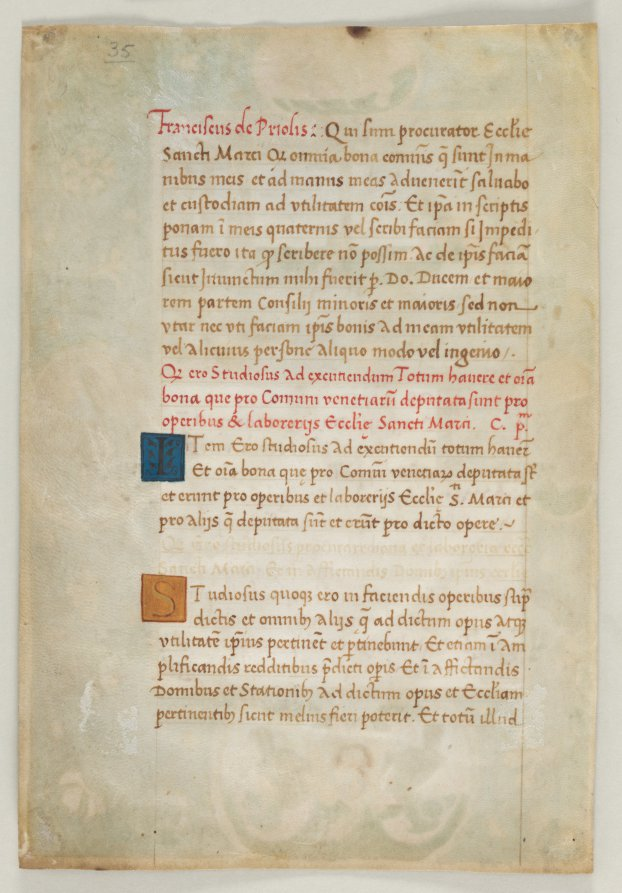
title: Leaf from a Commission: St. Mark Giving the Keys of Venice to Francesco de Priuli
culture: Italy, Padua and Venice, 16th century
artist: Benedetto Bordone (Italian)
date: c. 1523–1524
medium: ink, tempera and gold on vellum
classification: Manuscript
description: The miniature shows the enthroned figure of Saint Mark, patron saint of Venice, presenting the symbolic keys of Venice to the kneeling figure of Francesco de Priuli upon his appointment as Procurator of Saint Mark's. Beneath the miniature are twelve lines of text, the opening of a ducale issued by Doge Andrea Gritti (1523–38) announcing de Priuli's appointment, which was made in the early 1520s. The text begins, Nos Andreas Griti, Dei gratia Dux venetiarum (Our Andrea Gritti, By the Grace of God Duke of the Venetians). The illumination relates closely to the work of Benedetto Bordon, a Paduan-born miniaturist who became prominent in Venice. The decorative borders appear to be edged in thin gilt-bronze bars that give the illusion of fine metalwork. Four oval cartouches are occupied by the Lion of Saint Mark (top), the de Priuli arms (bottom), Saint Anthony the Great (right), and his symbol, a swine (left). The Priuli Arms below are festooned with wreaths and supported by mermen with horns and pink tails. This exquisite leaf exemplifies the changes in script, page layout, border decoration, and binding developed by the Italian humanist culture of the 1400s.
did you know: The coat of arms is supported by mermen, male mermaids, who are human from the waist up and fishlike from the waist down.